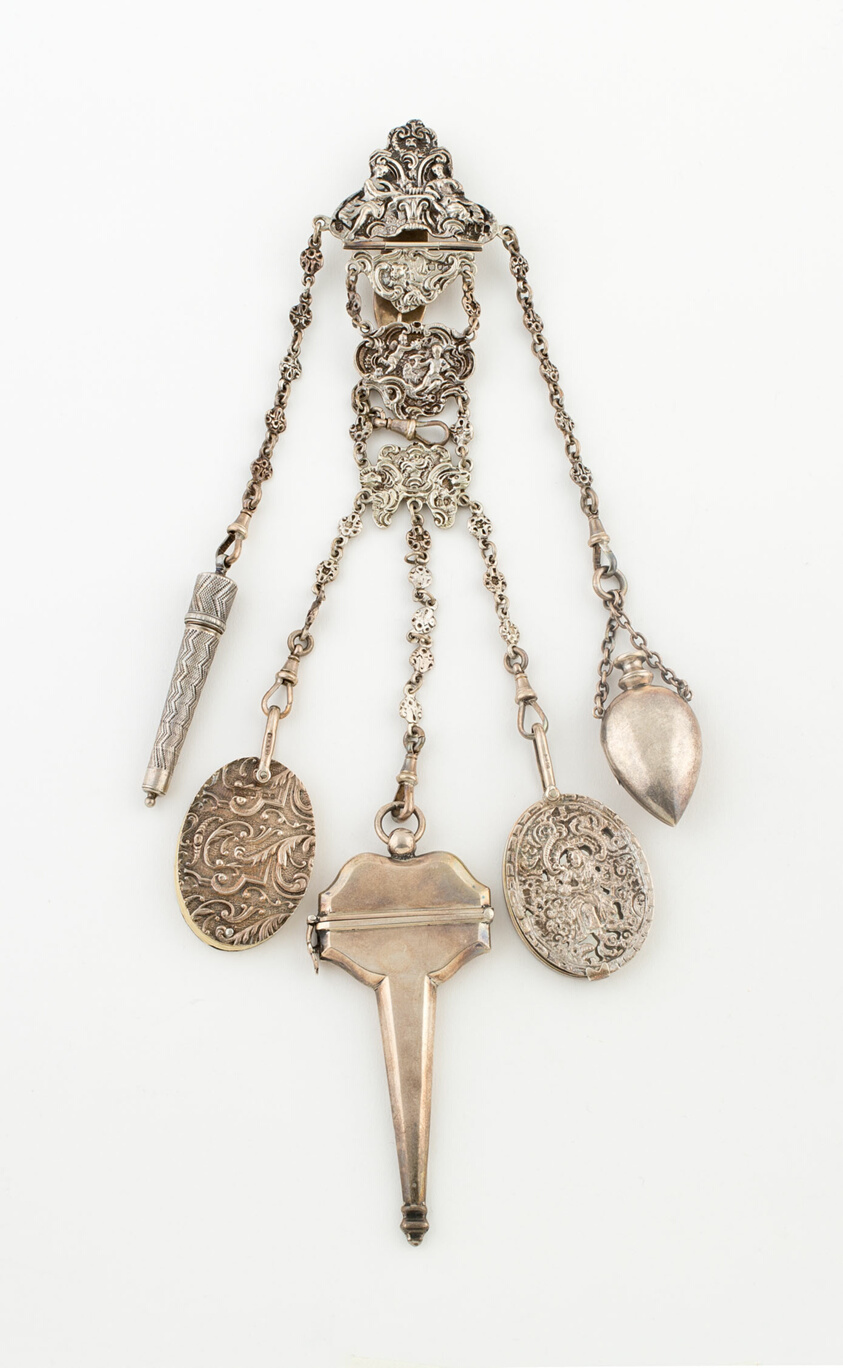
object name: Metalwork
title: Chatelaine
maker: London, England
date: 1901/04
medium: Silver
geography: London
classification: chatelaine; costume accessory worn at waist or below; costume accessory; european decorative arts; metalwork; silver; decorative object/ornament